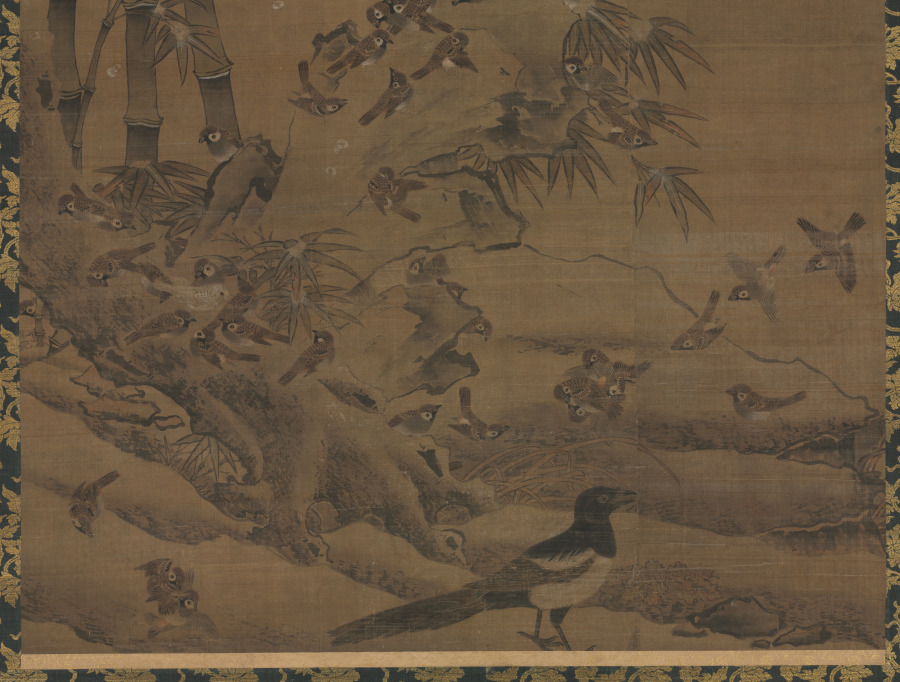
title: A Hundred Birds and the Three Friends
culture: China, Ming dynasty (1368–1644)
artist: Bian Wenjin (Chinese, about 1354–1428)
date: 1400–1425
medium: hanging scroll; ink and color on silk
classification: Painting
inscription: Artist's three seals: Pien yin Ching-chao; Sha-yang shih-chia; Ch'in shu ch'ing-lo.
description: In this hanging scroll birds rest and frolic among pines, bamboo, and flowering plum, plants known as “the three friends.” Due to their endurance in winter, they symbolize perseverance and friendship in adverse times. The naturalistic depiction of the birds refers to the bird-and-flower painting tradition of the Art Academy of the Song dynasty. The painter Bian Wenjin served at the court of the Ming dynasty Yongle Emperor (reigned 1402–24). This painting may have been hung in a private studio or palace hall on appropriate occasions.